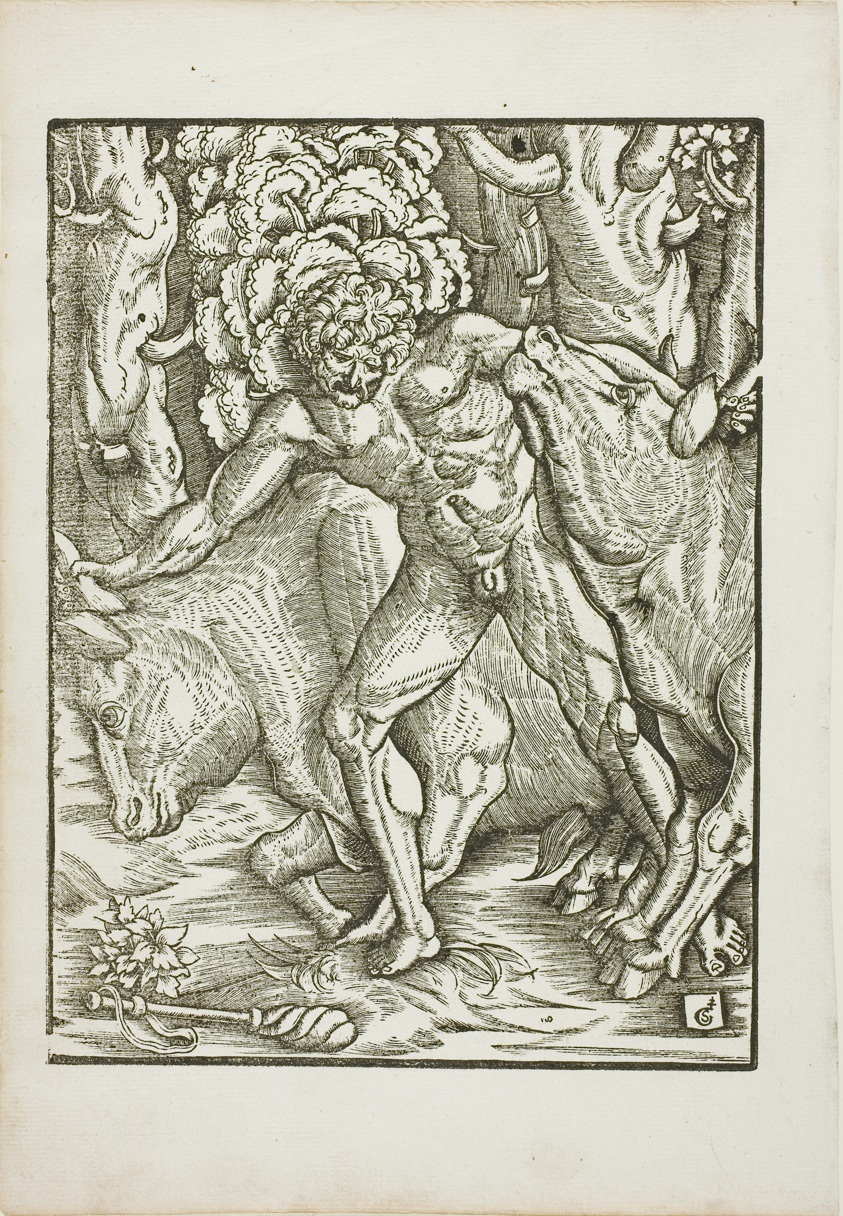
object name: Print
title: The Labors of Hercules: Capture of the Oxen of the Geryones in Erythia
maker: Gabriel Salmon (French, active 1504-1542)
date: c. 1528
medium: Woodcut on paper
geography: France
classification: woodcut; print; prints and drawing